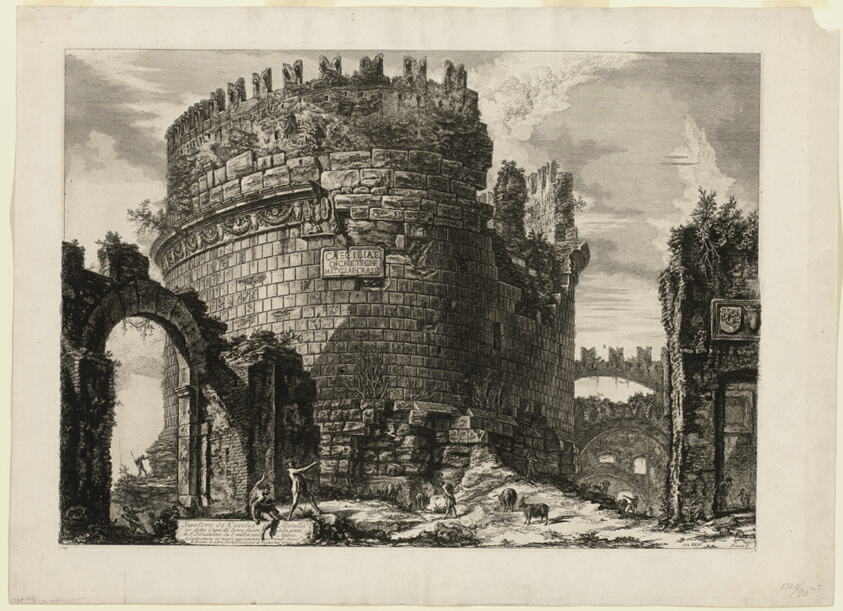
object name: Print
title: Tomb of Caecilia Metella, from Views of Rome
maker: Giovanni Battista Piranesi (Italian, 1720-1778); published by Francesco (Italian, 1758-1810) and Pietro Piranesi (Italian, born 1758/9)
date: 1762, published 1800–07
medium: Etching on heavy ivory laid paper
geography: Italy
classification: etching; print; prints and drawing